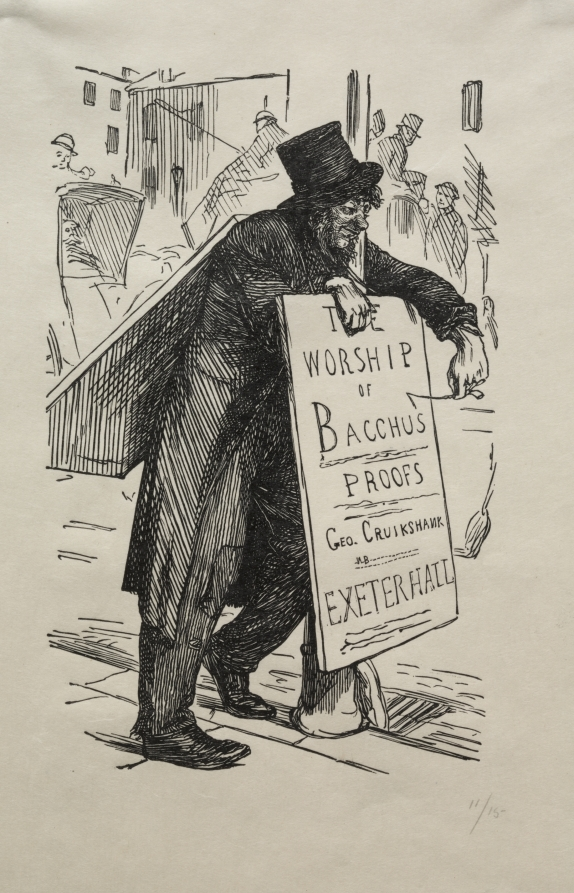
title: The Modern Art of Advertising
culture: England, 19th century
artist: George Louis Palmella Busson Du Maurier (British, 1834–1896)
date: 1863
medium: wood engraving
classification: Print